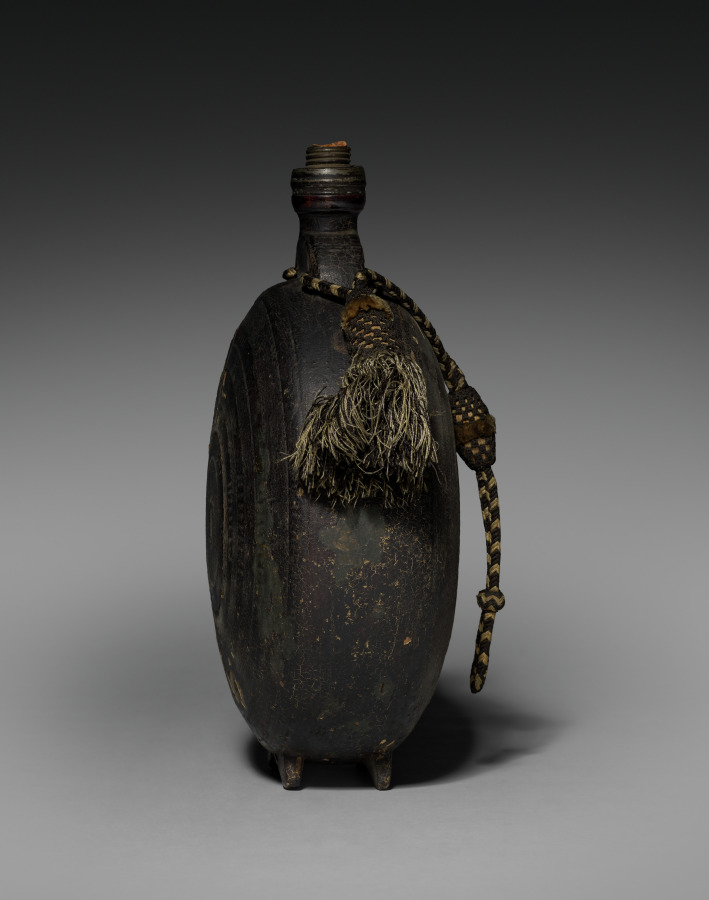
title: Powder Canister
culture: Italy, 18th century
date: 1700s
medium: wood painted black, lead charger, pewter mount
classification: Arms and Armor